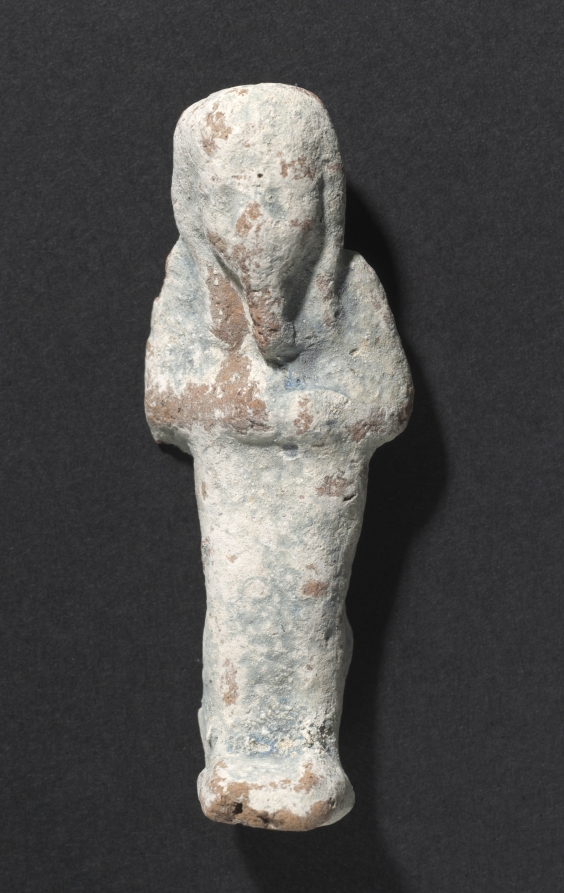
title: Shawabty of Ditamenpaankh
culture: Egypt, Late period (715–332 BCE), Dynasty 25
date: 715–656 BCE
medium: terracotta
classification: Funerary Equipment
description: High demand for shawabtys in the Late Period, a time when as many as 400 or more shawabtys were placed in the tomb with the deceased, gave rise to a specialized container for storing them: the shawabty box. This example is inscribed for the lady of the house, Ditamenpaankh, and was probably one of a pair originally made for her. The single-masted boat on the box's lid is perhaps an allusion to the pilgrimage of the deceased to the holy city of Abydos, the cult city of Osiris, king of the dead. The shawabtys inside are crude, mass-produced examples cast in an open mold. Made of terracotta, their blue paint imitates more costly shawabtys made of faience. As for the shawabty spell, it has been removed from its traditional location on the shawabty's front and relocated onto the sides of box, where it needed only to be written once, thus expediting production.